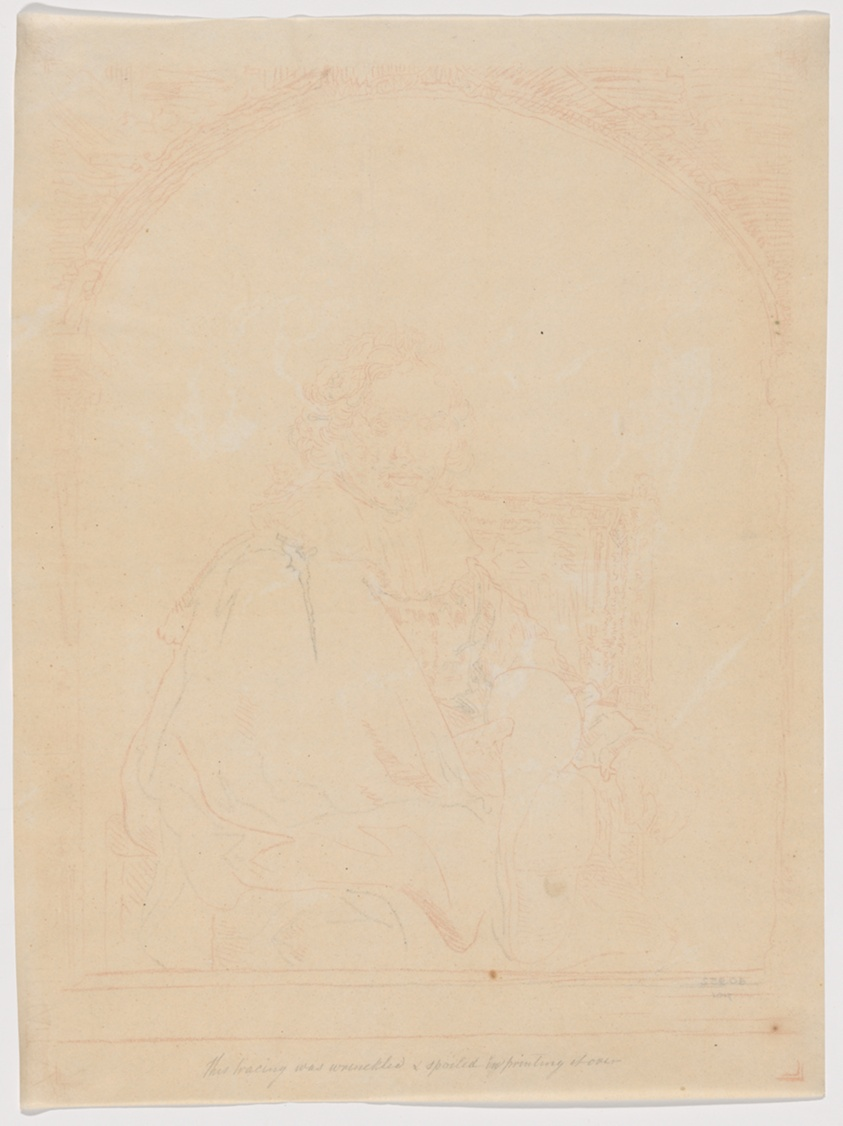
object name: Drawing and Watercolor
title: Study for Portrait of a Man in an Armchair, from Collection d'imitations de Dessins d'après les Principaux Maîtres Hollandais et Flamands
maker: Christian Josi (Dutch, died 1828); after Rembrandt van Rijn (Dutch, 1606-1669)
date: 1826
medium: Red chalk counterproof on tracing paper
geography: Netherlands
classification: chalk; drawings (visual works); prints and drawing